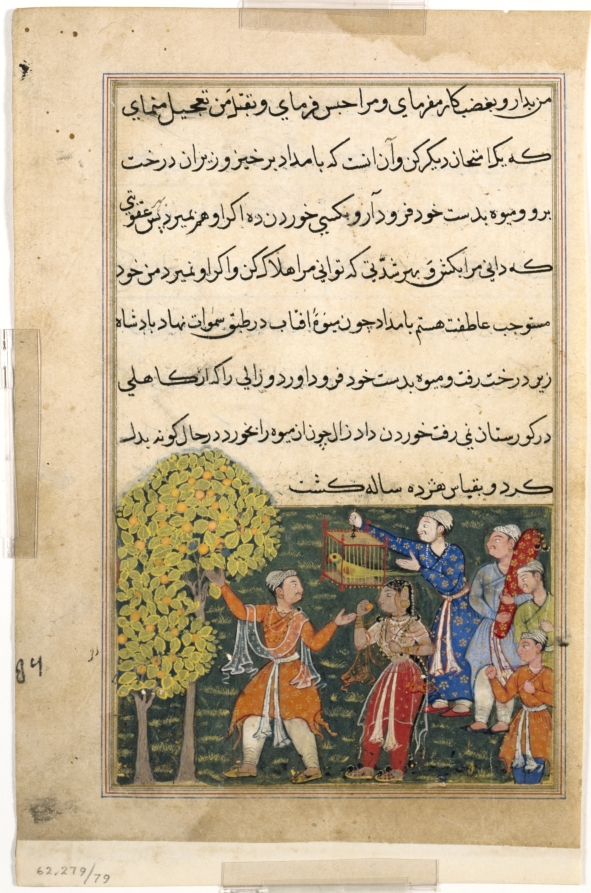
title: The king plucks fruit from the Tree of Life with his own hands and feeds it to a lady, from a Tuti-nama (Tales of a Parrot): Ninth Night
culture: Mughal India, court of Akbar (reigned 1556–1605)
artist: Suraju (Indian)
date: c. 1560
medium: gum tempera, ink, and gold on paper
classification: Painting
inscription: [su]rjū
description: In order to prevent his own execution, the loyal parrot must prove to the king that the fruit of the Tree of Life is not poisonous. When the fruit restores the youth of an old man, the parrot is vindicated. He watches from his cage, alongside other members of the court, as the king happily picks from the tree.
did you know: Black pom-poms on the woman's shoes, braid, and jewelry indicate the ends of ties.